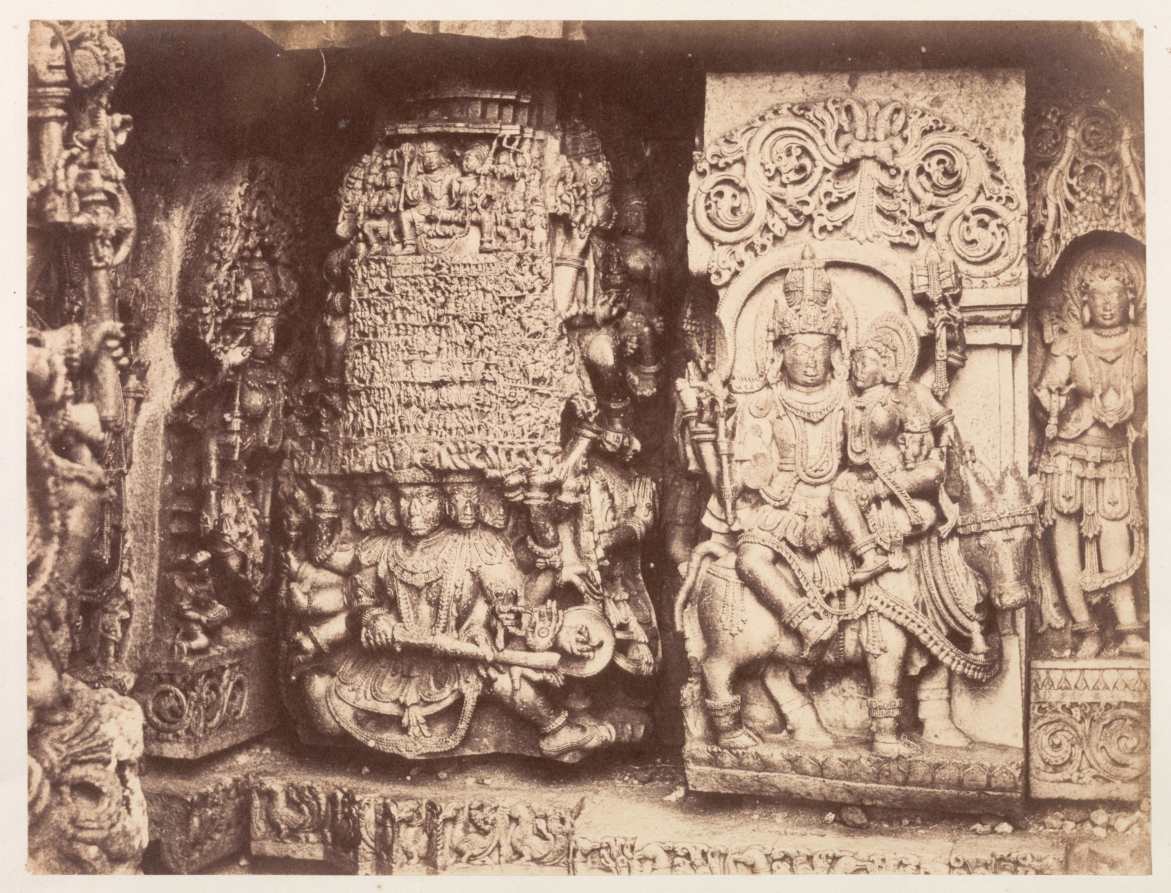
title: Hoyshaleshvara Temple Sculpture, Halebidu (Halebeedu)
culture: England, 19th century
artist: Richard Banner Oakeley (British, 1834–1914)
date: 1856–57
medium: albumenized salt print from waxed paper negative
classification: Photograph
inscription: written in pencil on recto of mount: "Q1437"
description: On the recommendation of a friend, Oakeley marched 20 days along treacherous country roads to locate the Hoyshaleshvara Temple in southwestern India. Finding it more beautiful than any other building he had seen in southern India, he framed his subject to capture a sense of the lavish number of vivid sculptures that enliven the temple's walls. At the right is the Hindu god Shiva with his wife, the goddess Parvati, seated on his mount, the bull Nandi. At the left, Shiva and Parvati are seated on Mount Kailasha, which a multiarmed demon is attempting to dislodge.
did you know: Holysaleswara Temple is a magnificent example of Hindu architecture and sculpture begun during the first half of the 12th century.